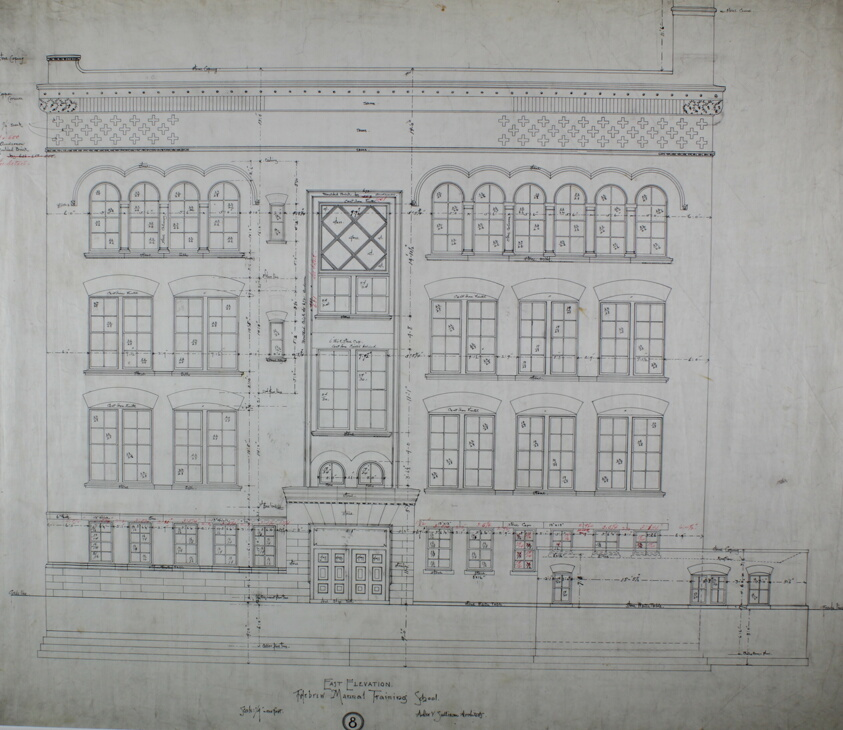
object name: Architectural Drawing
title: Hebrew Manual Training School, Chicago, Illinois, East Elevation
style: 19th century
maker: Adler and Sullivan; American, 1883-1895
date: 1889/90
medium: Black ink on linen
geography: 12th Place, 554 West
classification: architectural drawing; architecture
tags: schools, Judaism, elevation, Chicago